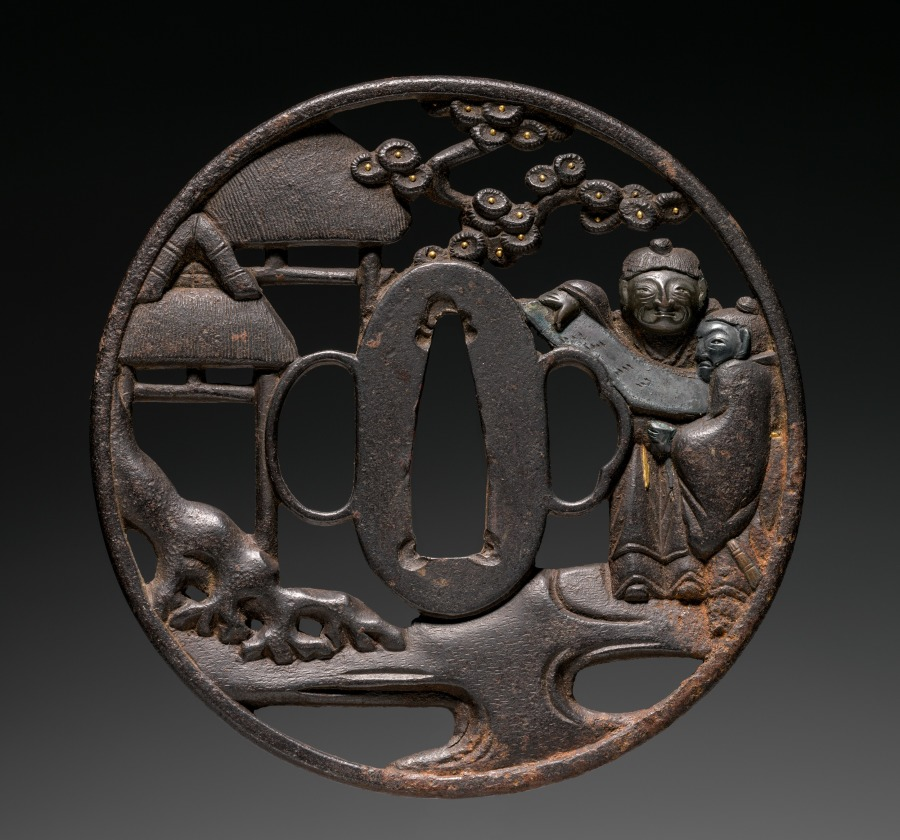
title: Sword Guard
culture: Japan, Edo period (1615–1868)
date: c. 1800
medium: iron (Soten type)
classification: Arms and Armor